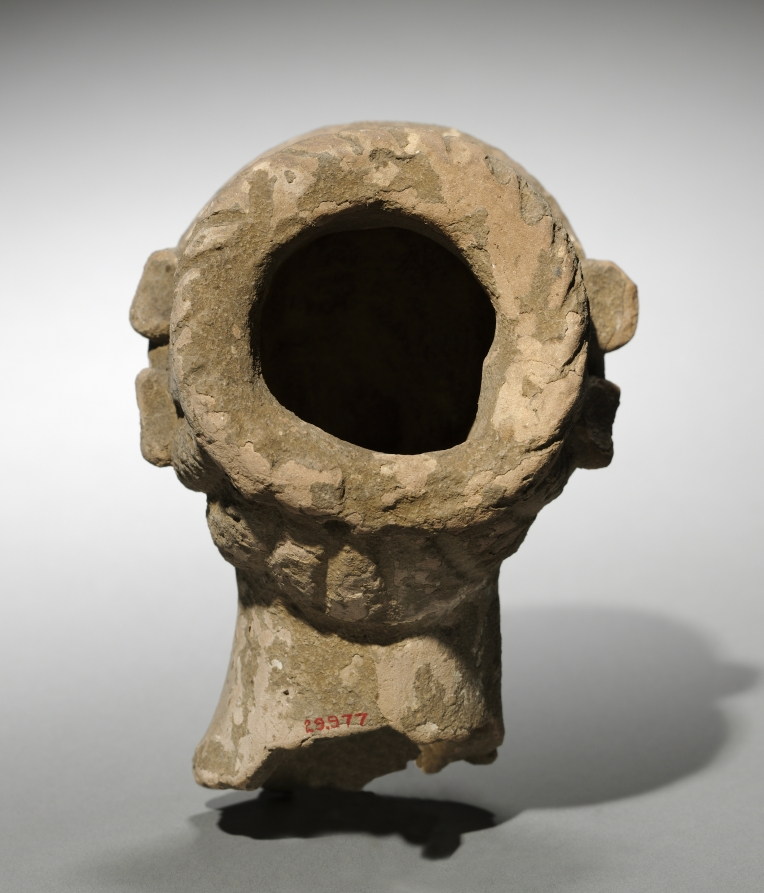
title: Head of a Woman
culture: Greece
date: 400s BCE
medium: terracotta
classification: Sculpture